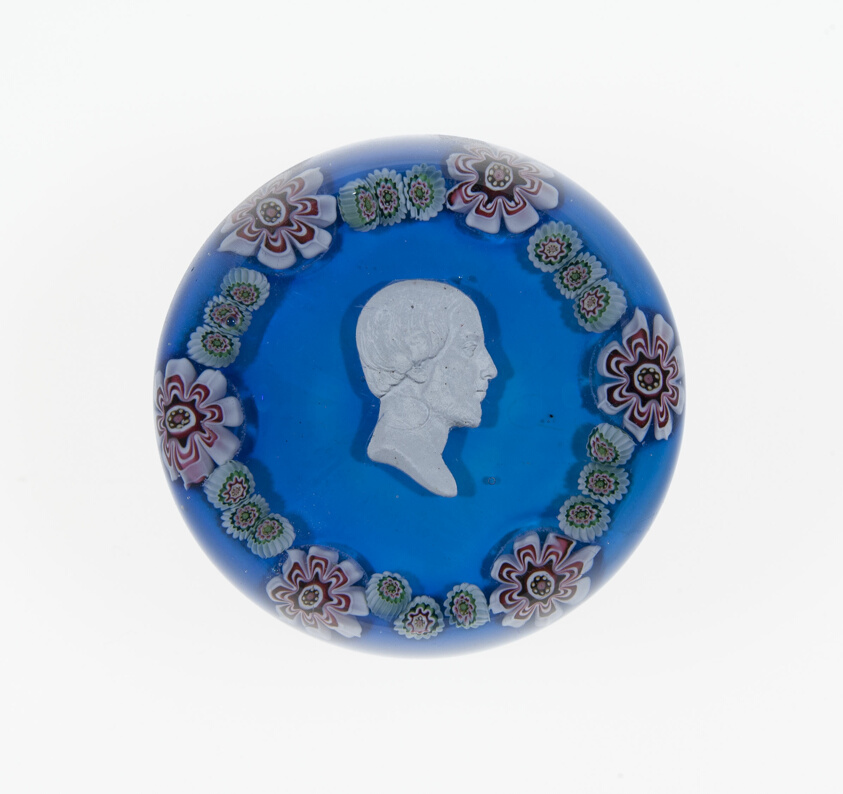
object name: Glass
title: Paperweight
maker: Clichy Glassworks (Cristalleries de Clichy); Clichy, France, 1837-1885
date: c. 1846–55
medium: Glass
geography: Clichy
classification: paperweight; glass